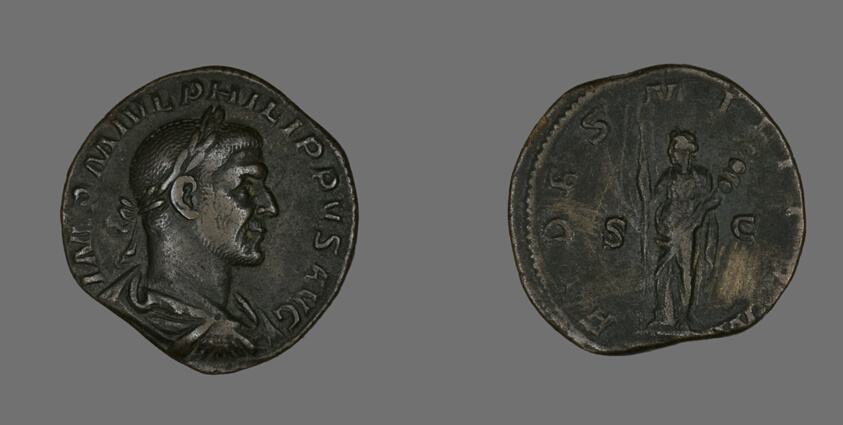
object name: Coin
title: Coin Portraying Philip the Arab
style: roman (ancient, style or period), ancient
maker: Roman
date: 244-249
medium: Bronze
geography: Roman Empire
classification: coin; ancient art